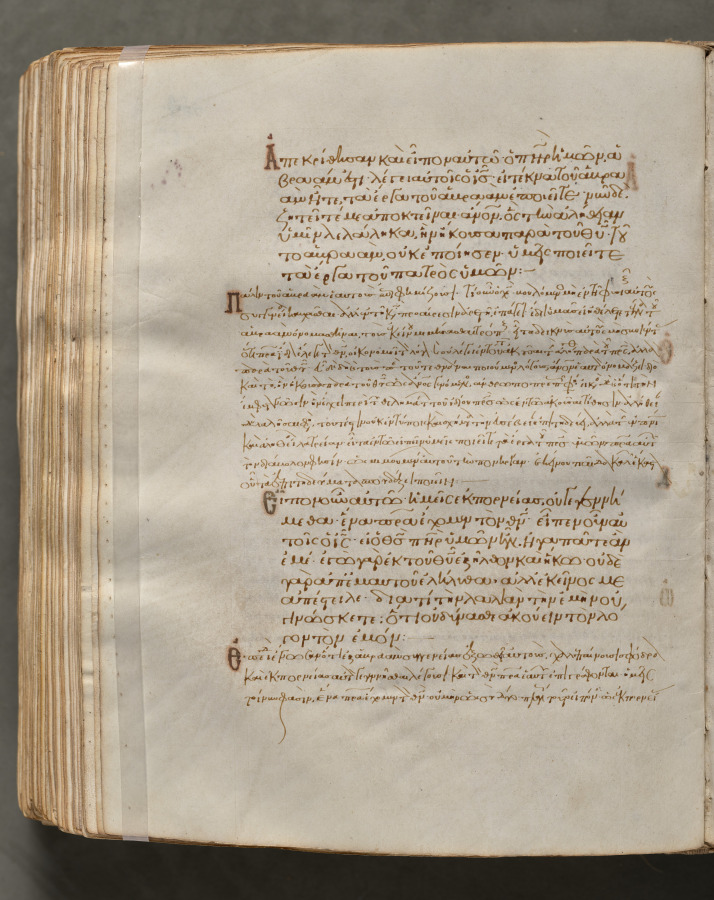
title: Text, folio 365 (verso), from a Gospel Book with Commentaries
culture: Byzantium, Constantinople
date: c. 1000–1100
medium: ink, tempera, and gold on vellum; leather binding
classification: Bound Volume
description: Each of the four gospels in this book opens on a page with brilliantly illuminated borders depicting the author of the text as well as birds—principally peacocks, symbols of the immortality of the soul—and fountains, representing the fountain of life and the salvation of the soul. This volume consists of 428 leaves with texts in Greek. Its level of sophistication suggests that it was probably written and decorated in a monastery in Constantinople.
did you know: Gospel books were carried in procession through Byzantine churches.